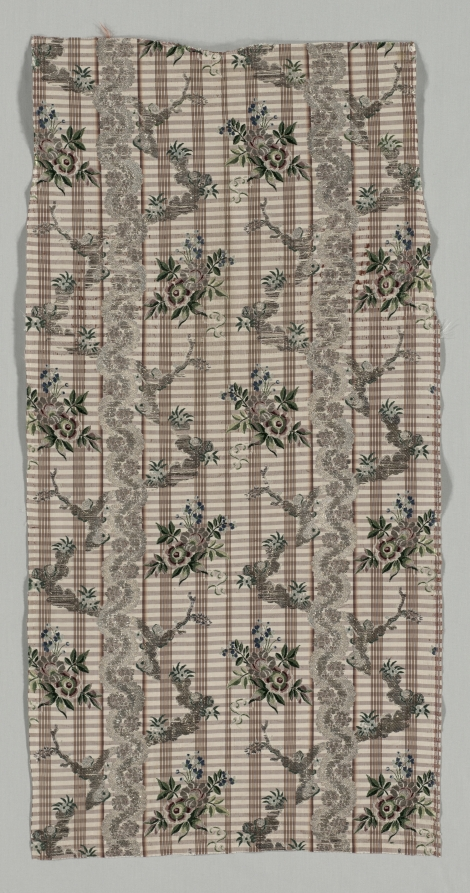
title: Length of Brocaded Silk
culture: France, 18th century, Period of Louis XVI (1774-1793)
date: 1774–1793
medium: brocade; silk and metal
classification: Textile